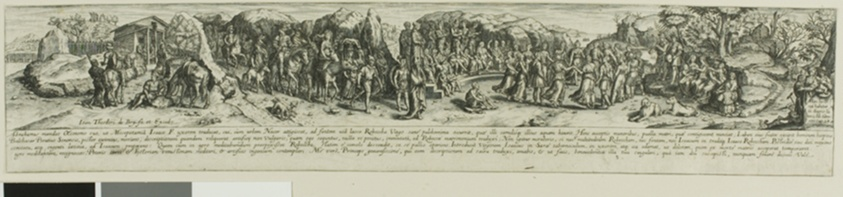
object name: Print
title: Eleazar and Rebecca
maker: Johann Theodor de Bry (German, 1561-1623); after Baldessare Peruzzi (Italian, 1481-1536)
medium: Engraving in black on ivory laid paper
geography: Germany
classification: engraving; print; prints and drawing